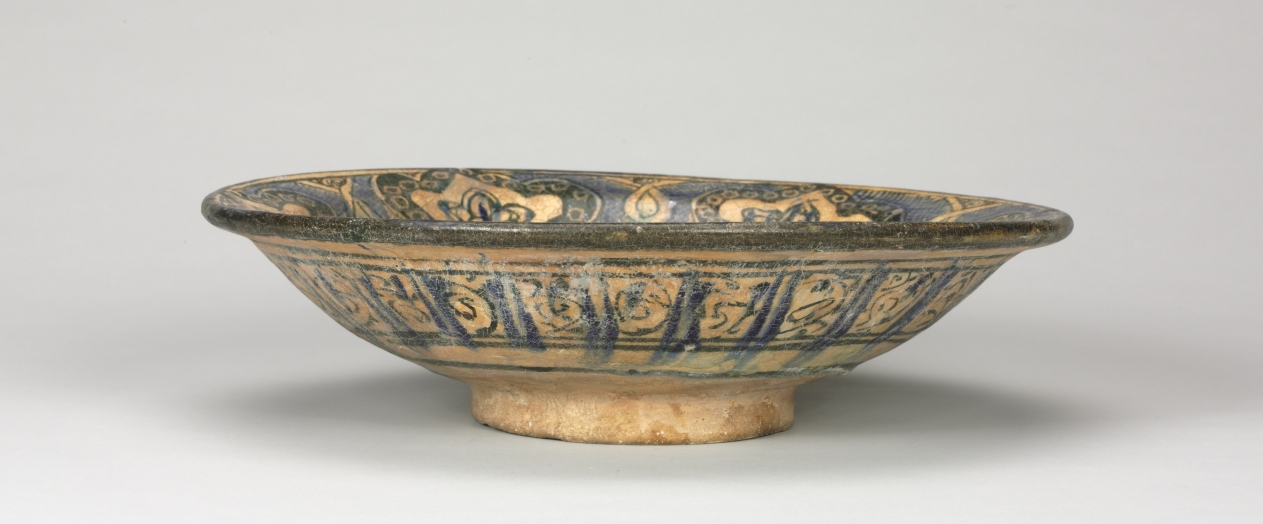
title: Bowl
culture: Iran, probably Sultanabad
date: 1300–1350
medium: fritware with underglaze-painted design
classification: Ceramic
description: Sultanabad wares were the first new type of pottery made in Iran after the Mongol conquest. These underglaze painted wares are characterized by a somber color scheme of gray, black, and white. The name "Sultanabad" comes from the modern city near which they were first discovered. This type of pottery was widely exported, perhaps even imitated, for it has been excavated over a vast area from central Asia to Egypt.